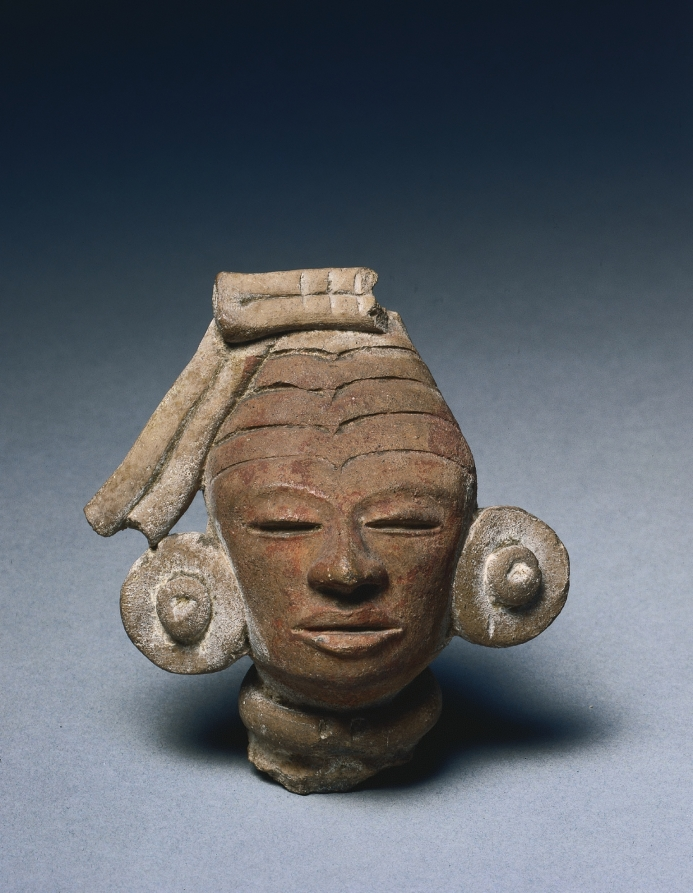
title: Figurine Head Fragment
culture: Central Mexico, Teotihuacán, Classic period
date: 150–350 CE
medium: ceramic, pigment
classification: Ceramic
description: The earliest Teotihuacan figurines are hand modeled, while later specimens were produced with molds. This exceptionally large example has a mold-made head, with facial features carefully retouched by hand. Earthenware figurines were made in great abundance throughout Teotihuacan's history, and may have been used in household religious rituals.